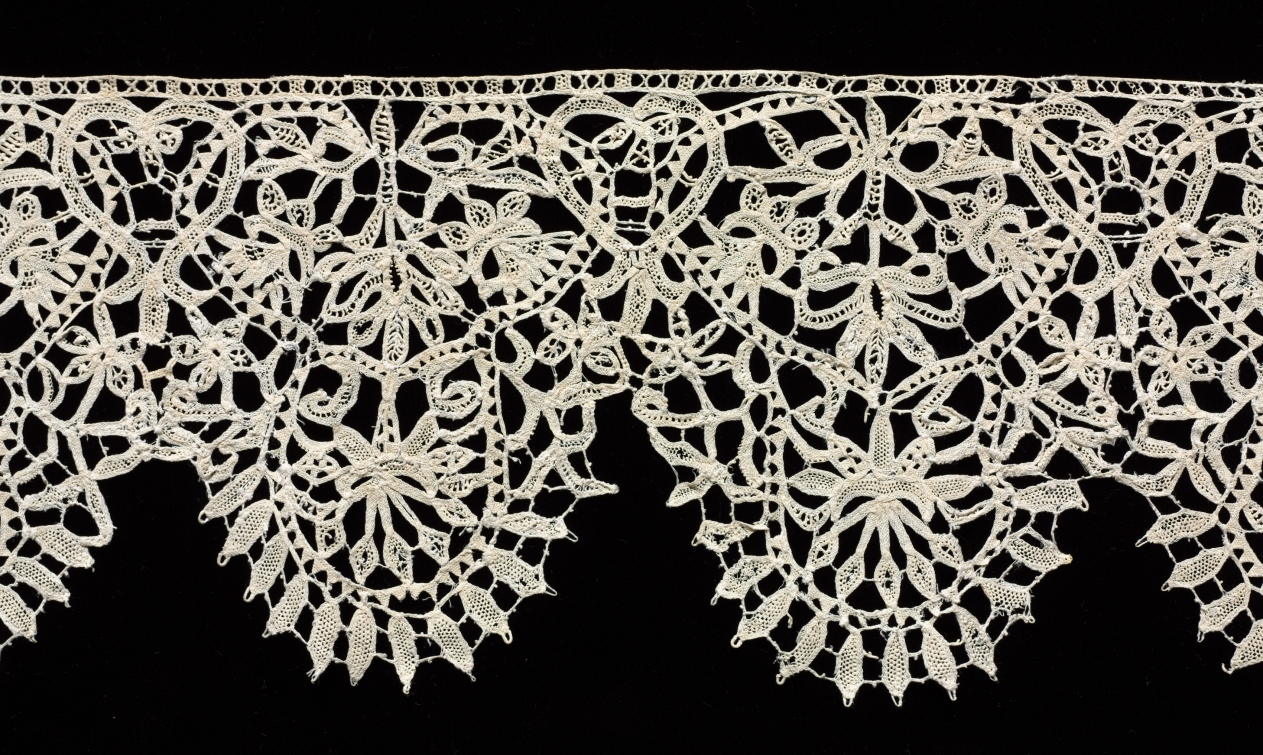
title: Lace Collar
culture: Italy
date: 1600–1640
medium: Needle lace (punto in aria)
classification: Lace